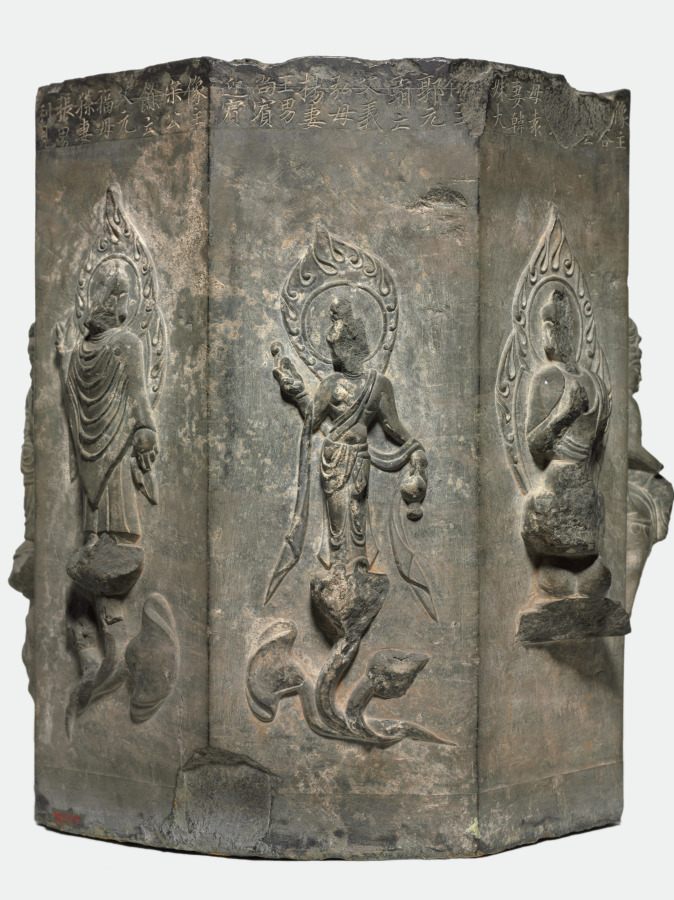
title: Section of a Dharani Pillar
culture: China, Tang dynasty (618-907)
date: 618–907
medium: limestone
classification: Sculpture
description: This octagonal stone pillar, with Buddhist figures carved on its eight sides, is part of a dharani pillar commissioned by Buddhist believers to pay tribute to the dead. The eight inscriptions seen here are eulogies dedicated by eight families to their deceased family members. Dharanis were a form of spell in Esoteric Buddhism said to possess supernatural power when being recited or carried and were incorporated into sutras, such as the Buddha Usnisa Vijaya Dharani Sutra. Dharani pillars, also called sutra pillars, became the dominant bearers of Usnisa Vijaya Dharani which supposedly helped sentient beings prolong life and destroy hardships of the eternal cycle of life and the realms of hell.